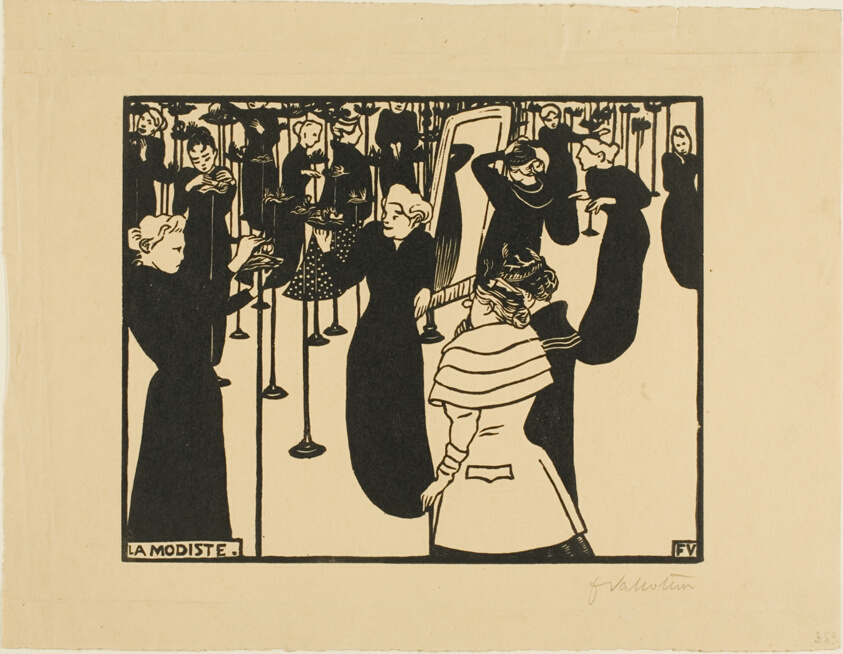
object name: Print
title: The Milliner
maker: Félix Edouard Vallotton (French, born Switzerland, 1865-1925)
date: 1894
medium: Woodcut in black on cream wove paper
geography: France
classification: woodcut; print; prints and drawing